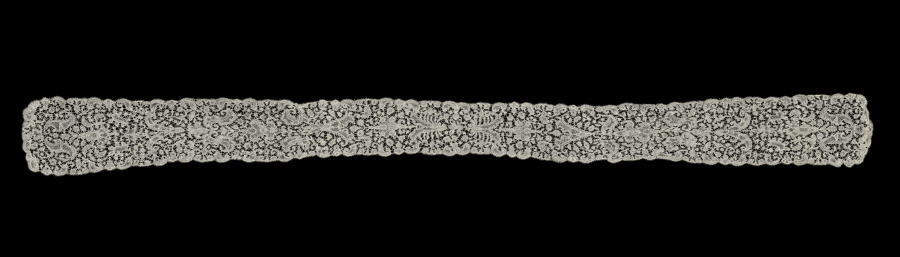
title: Lace Lappet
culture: Belgium, Brussels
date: early 1700s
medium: Linen: bobbin lace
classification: Lace